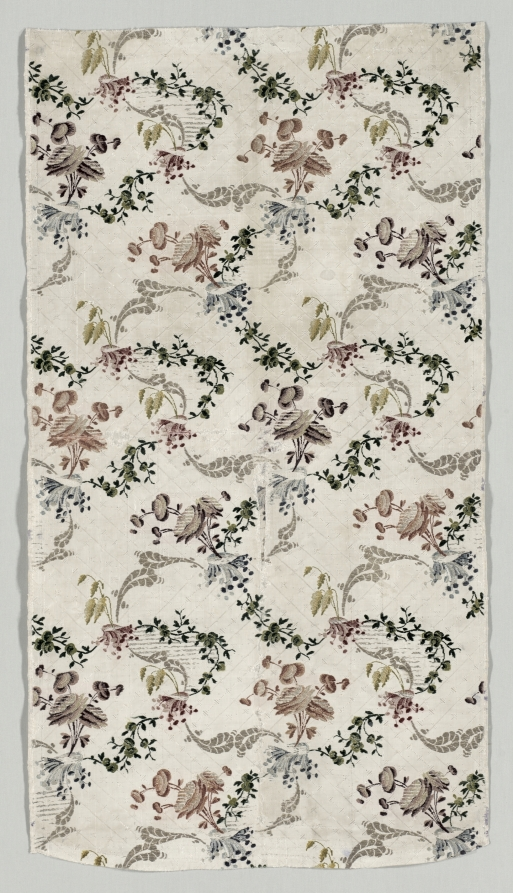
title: Length of Brocaded Silk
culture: France, 18th century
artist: style of Jean Baptiste Pillement (French, 1728–1808)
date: 1723–1774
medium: brocade; silk, gold and silver threads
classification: Textile